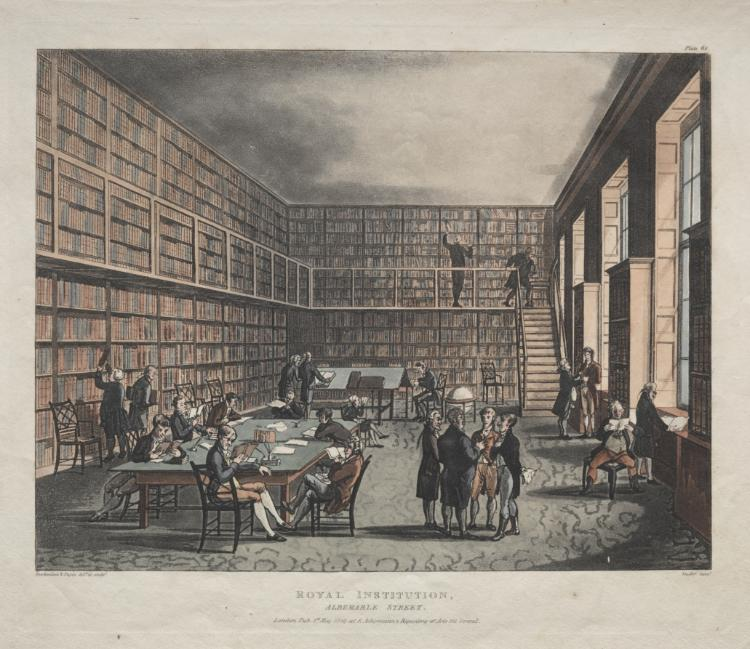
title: Royal Institution, Albemarle Street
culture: England, 19th century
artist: Thomas Rowlandson (British, 1756–1827)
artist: and Augustus Charles Pugin (British, 1762–1832)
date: 1809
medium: etching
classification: Print